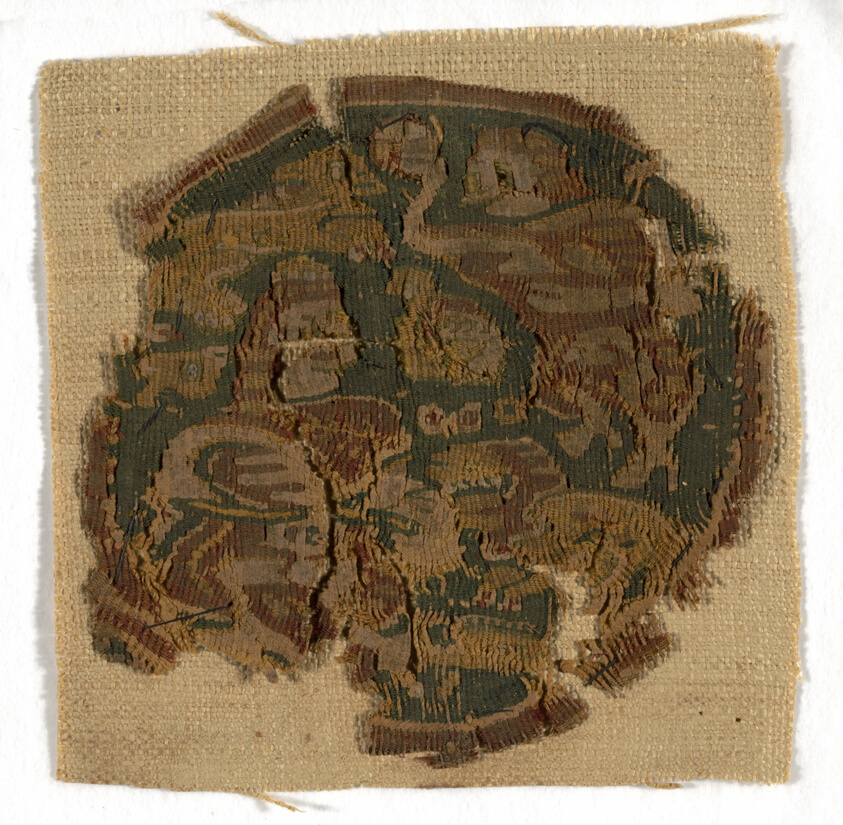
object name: Textile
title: Roundel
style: roman period (egyptian)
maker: Coptic (Egypt)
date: Roman period (30 B.C.– 641 A.D.)/Arab period (641–969), 5th/8th century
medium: Linen and wool, tapestry weave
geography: Egypt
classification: textile; weaving